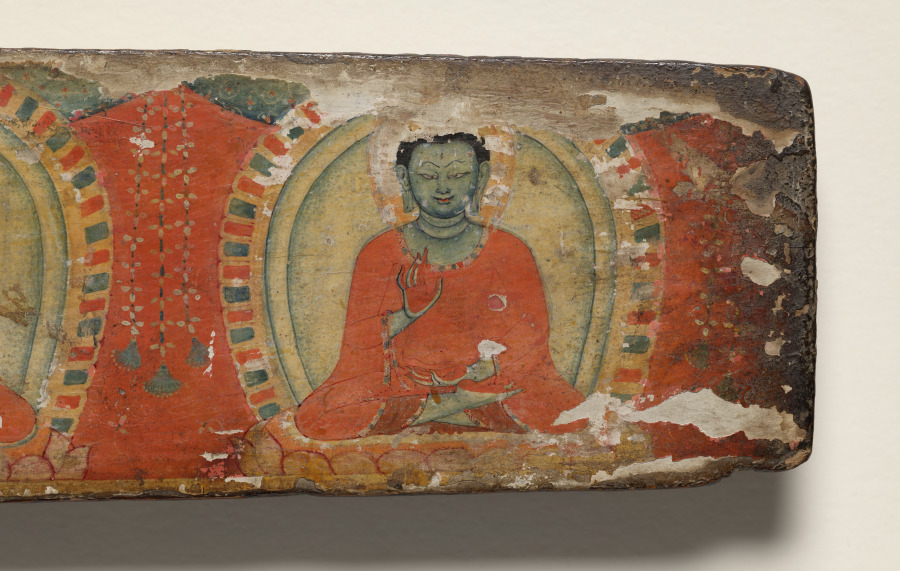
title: Ratnasambhava, Akshobhya, Vairochana with attendants, Amitabha, and Amoghasiddhi, Top cover, from a Manuscript of the Perfection of Wisdom in Eight Thousand Lines (Ashtasahasrika Prajnaparamita-sutra)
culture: Eastern India, Bihar, Vikramashila Monastery. Paintings: Nepal, Kathmandu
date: Sunday, September 14, 1119 (year 239 of the Newar Samvat in the month of Ashvina)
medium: Covers: Gum tempera, colors, and paper on wood; pages: gum tempera and ink on palm leaves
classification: Painting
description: The inner side of the top cover is fully painted with images of the Five Cosmic Buddhas of Esoteric Buddhism. Each one has a different color, meaningful hand gesture, and is associated with a spatial direction. In the center is the white Vairochana holding his hands in the enlightenment mudra. On either side of the binding holes are the other four Cosmic Buddhas Akshobyha (blue, earth-touching mudra, east) and Amitabha (red, meditation mudra, west), and on the ends are Ratnasambhava (gold, gift-giving mudra, south) and Amoghasiddhi (green, fear-not mudra, north). The top side is covered with ritual materials indicating that this book was once an object of worship.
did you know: The Five Tathagatas could be the source of visions that would help Buddhist practitioners on the path to enlightenment.